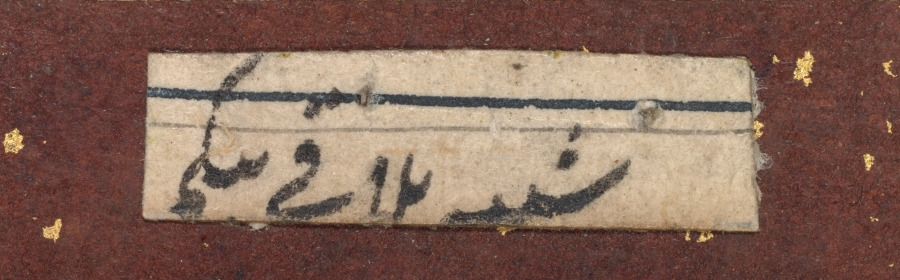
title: Calligraphy of a ghazal of Amir Khusrau Dihlavi (Indian, 1253–1325) (verso)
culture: India, Farrukhabad, Mughal, 18th century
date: c. 1760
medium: Gum tempera, ink, and gold on paper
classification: Calligraphy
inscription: verso: six lines of Persian poetry in nast 'aliq calligraphy